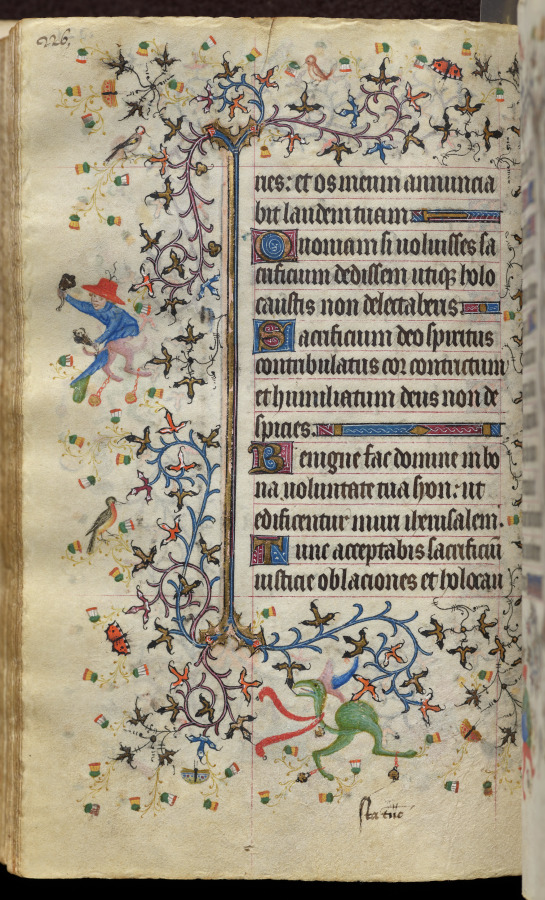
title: Hours of Charles the Noble, King of Navarre (1361-1425): fol. 113v, Text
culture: France, Paris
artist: Master of the Brussels Initials and Associates (French)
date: c. 1405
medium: ink, tempera, and gold on vellum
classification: Bound Volume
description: This precious volume was obviously highly prized by its owner, the French-born King of Navarre, who had his coat of arms painted on no less than twenty folios. Rather than directly commissioning this manuscript from a specific workshop, it seems that Charles the Noble acquired his book of hours -- perhaps ready-made for the luxury market -- while on a trip to Paris in 1404-05. A collaborative effort, six painting styles are evidenced within the pages of this codex, those of two Italians, two Frenchmen, and two Netherlanders. The painter who was responsible for the planning and decoration of the book, and who produced seventeen of the large miniatures, was a Bolognese artist known as the Master of the Brussels Initials. His principal assistant, responsible for most of the borders, was a Florentine who signed his name "Zecho" da Firenze on folio 208 verso.